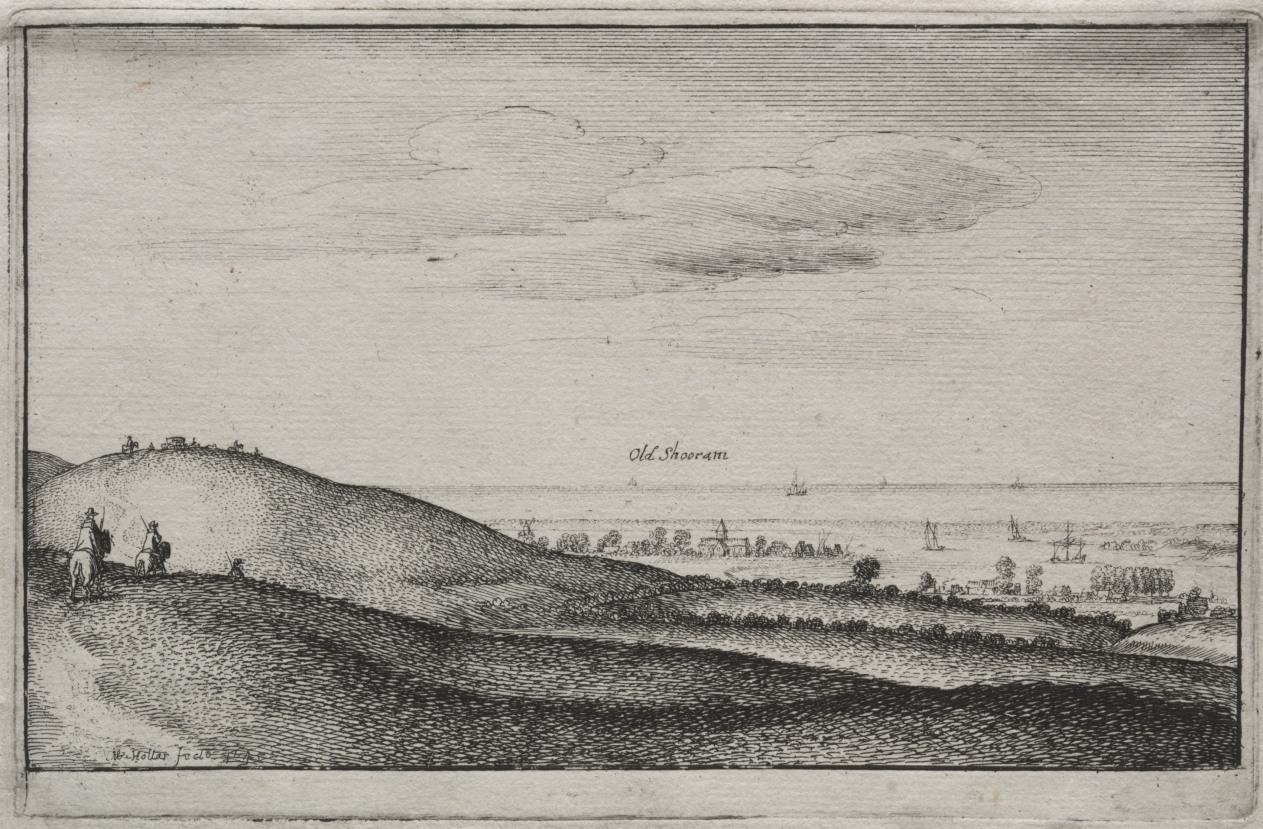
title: English Views: Old Shoreham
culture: Bohemia, 17th century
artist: Wenceslaus Hollar (Bohemian, 1607–1677)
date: 1645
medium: etching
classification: Print